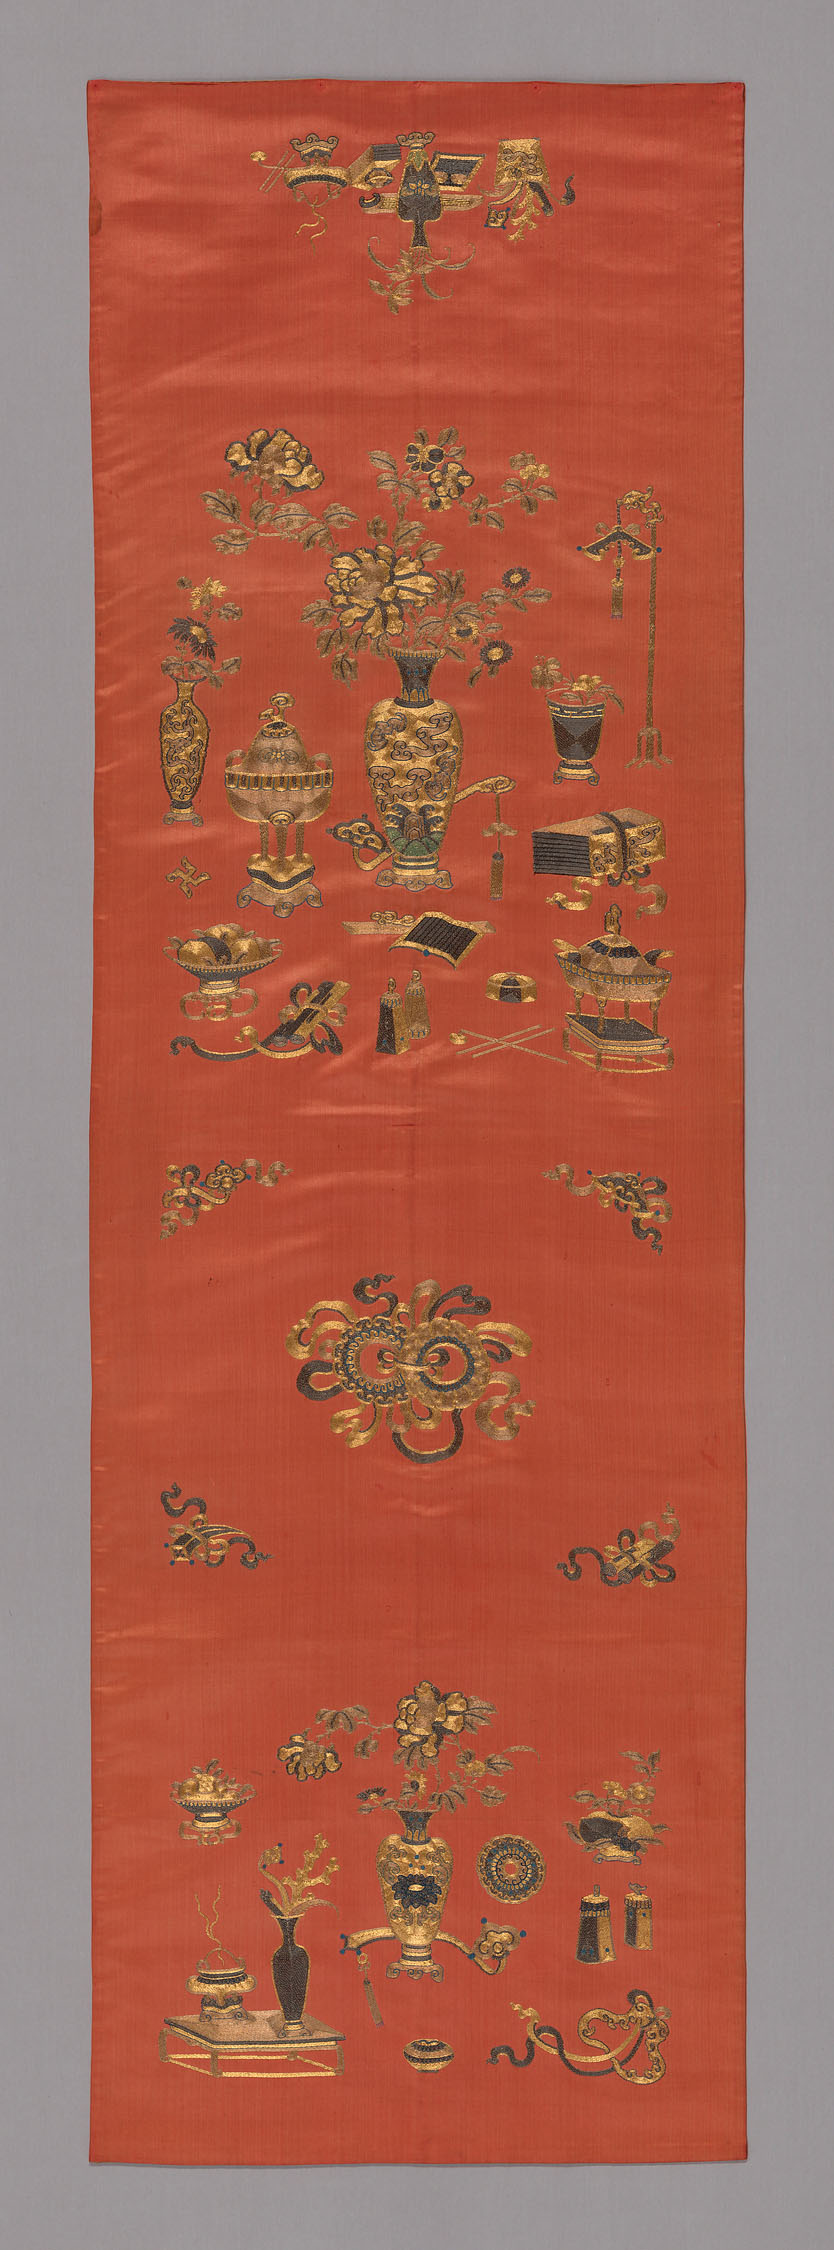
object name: Textile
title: Chair Cover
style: qianlong, qing, Chinese (culture or style), East Asian, asian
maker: China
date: Qing dynasty (1644–1911), 1800/25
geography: China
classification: textile; weaving; needlework (visual works)